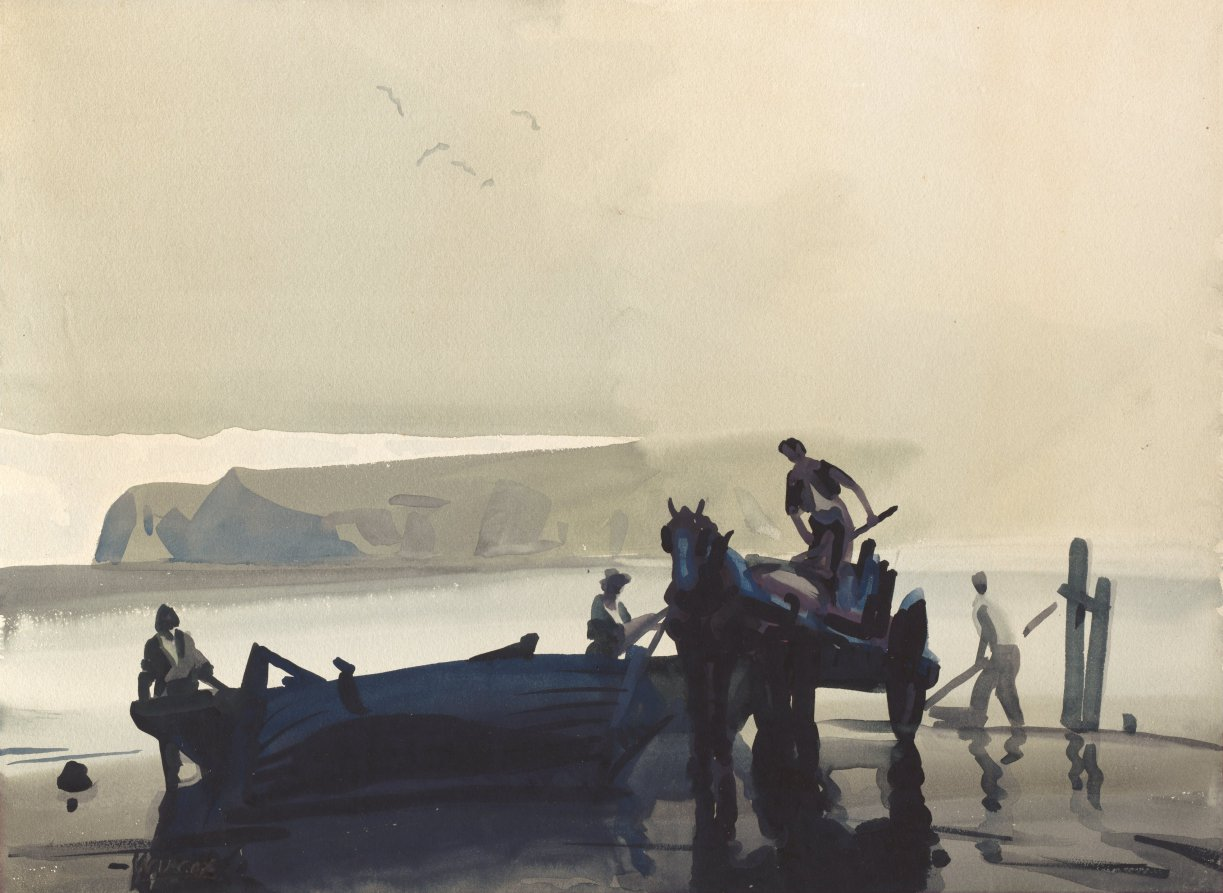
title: The Trailing Fog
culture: America, Ohio, Cleveland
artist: Frank Wilcox (American, 1887–1964)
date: c.1910–29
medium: watercolor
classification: Drawing